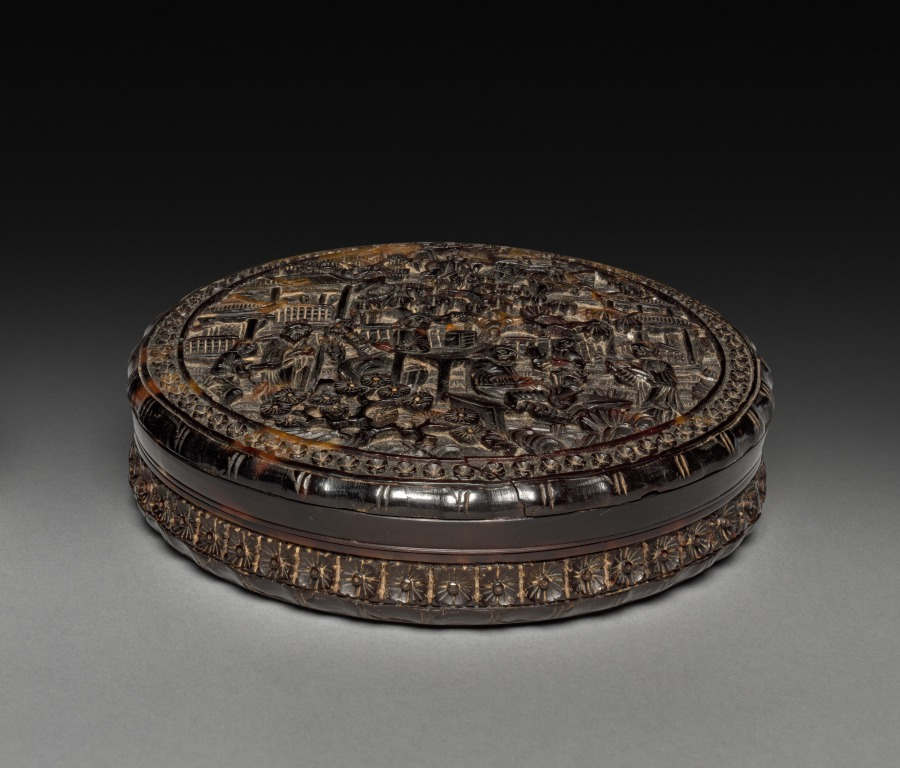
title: Fragrance Box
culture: China, Qing dynasty (1644-1911)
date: 1700s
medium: tortoiseshell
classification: Miscellaneous